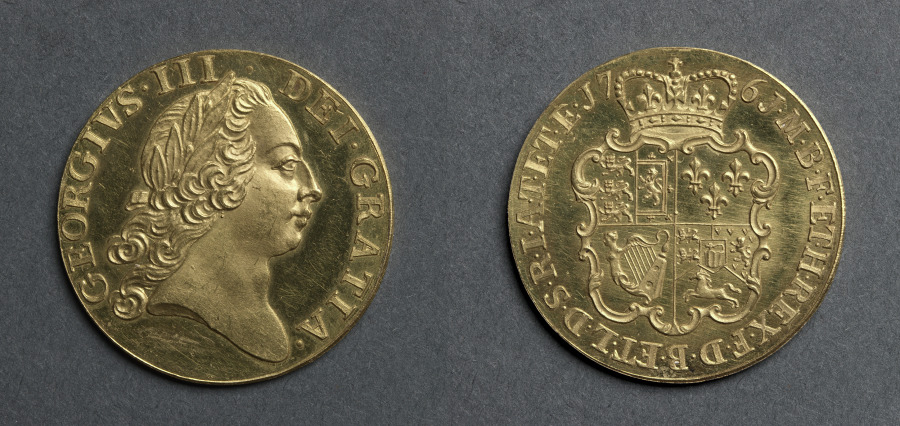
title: Guinea: George III (obverse); Shield of Arms (reverse)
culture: England, George III, 1760-1820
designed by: Richard Yeo (British, 1720–1779)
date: 1761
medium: gold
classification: Coins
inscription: DEI . GRATIA . GEORGIVS . III .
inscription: M.B.F.ET.H.REX.F.D.B.ET.L.D.S.R.I.A.T.ET.E.1761.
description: No five- or two-guinea pieces were issued for general circulation during this reign, but there were large numbers of guineas, the unit piece. The reign saw a profusion of pattern and proof pieces being struck, mostly because a further coinage reform was imminent, as was the removal of the Royal Mint from the Tower of London, where there had been a mint for over 600 years. Richard Yeo was appointed assistant engraver at the Royal Mint in 1749, chief engraver in 1775, and died in 1779. He was responsible for a large number of pattern pieces and for some of the currency coins of the period. This coin, one of the earliest patterns of the reign, bears a portrait on the obverse similar to that of George II rather than George III.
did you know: Richard Yeo first came to notice in 1746, when he produced the official medal for the battle of Culloden.